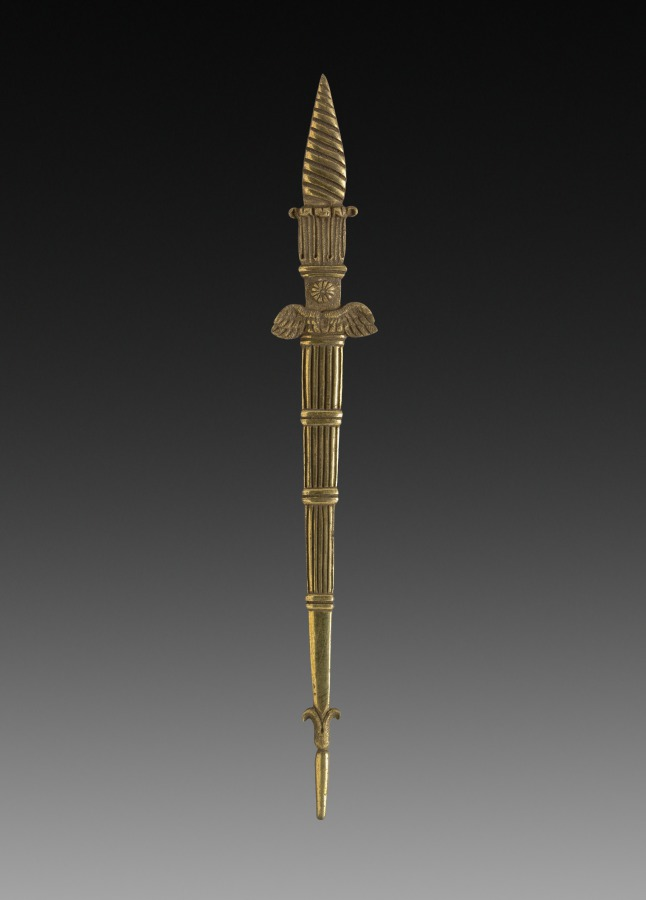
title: Ornamental Detail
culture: France, 18th century, Period of Louis XVI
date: 1775–1799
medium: gilt bronze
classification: Metalwork